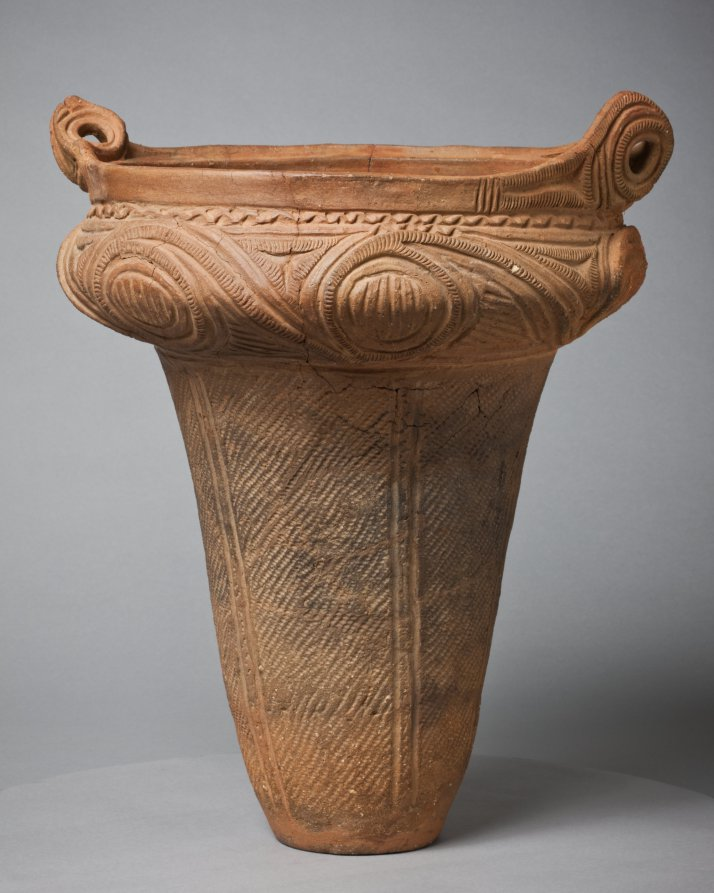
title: Urn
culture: Japan, Jōmon period (c. 10,500–300 BCE)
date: c. 2000 BCE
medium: earthenware, terracotta, impressed and incised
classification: Ceramic